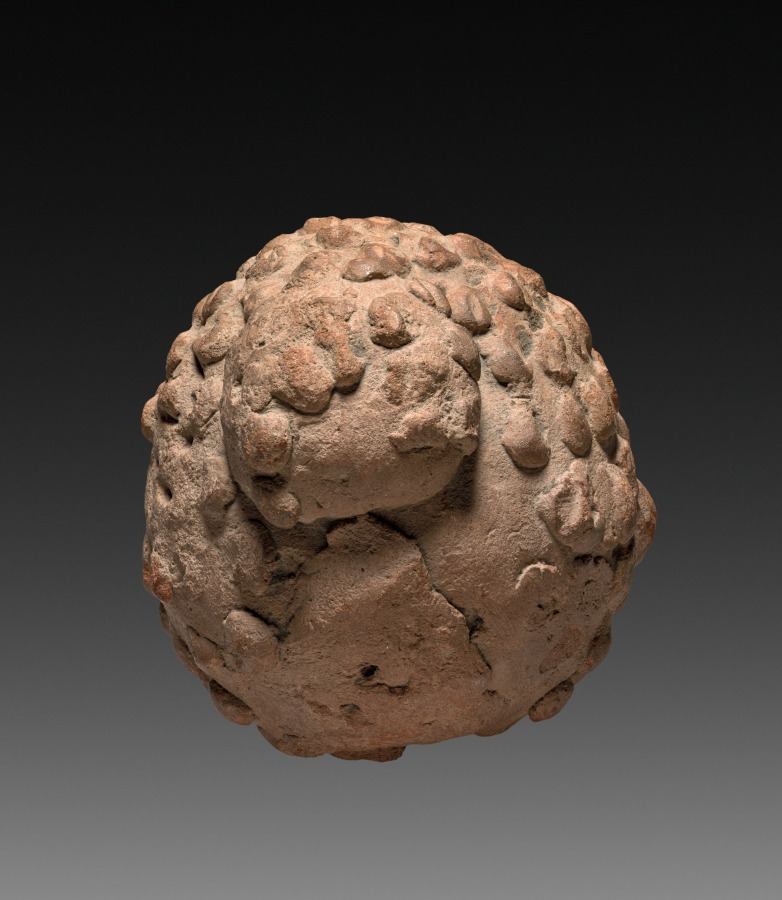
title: Head of Buddha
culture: India, Kashmir, Akhnur school, 8th century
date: 700s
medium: Clay, accidentally burned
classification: Sculpture